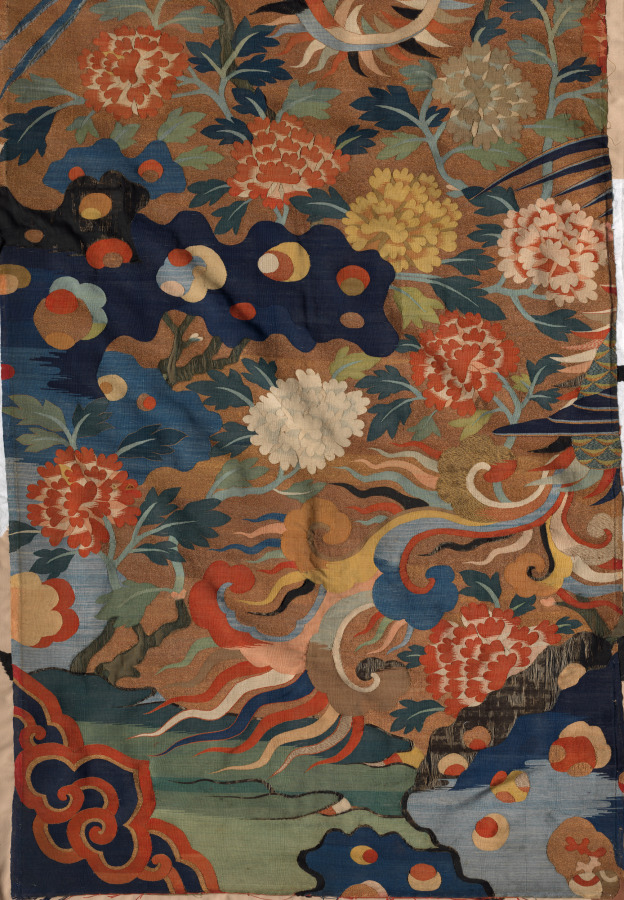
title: Tapestry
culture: China, Ming Period (1368-1644)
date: 1368–1644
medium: tapestry weave, silk and gold thread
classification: Tapestry